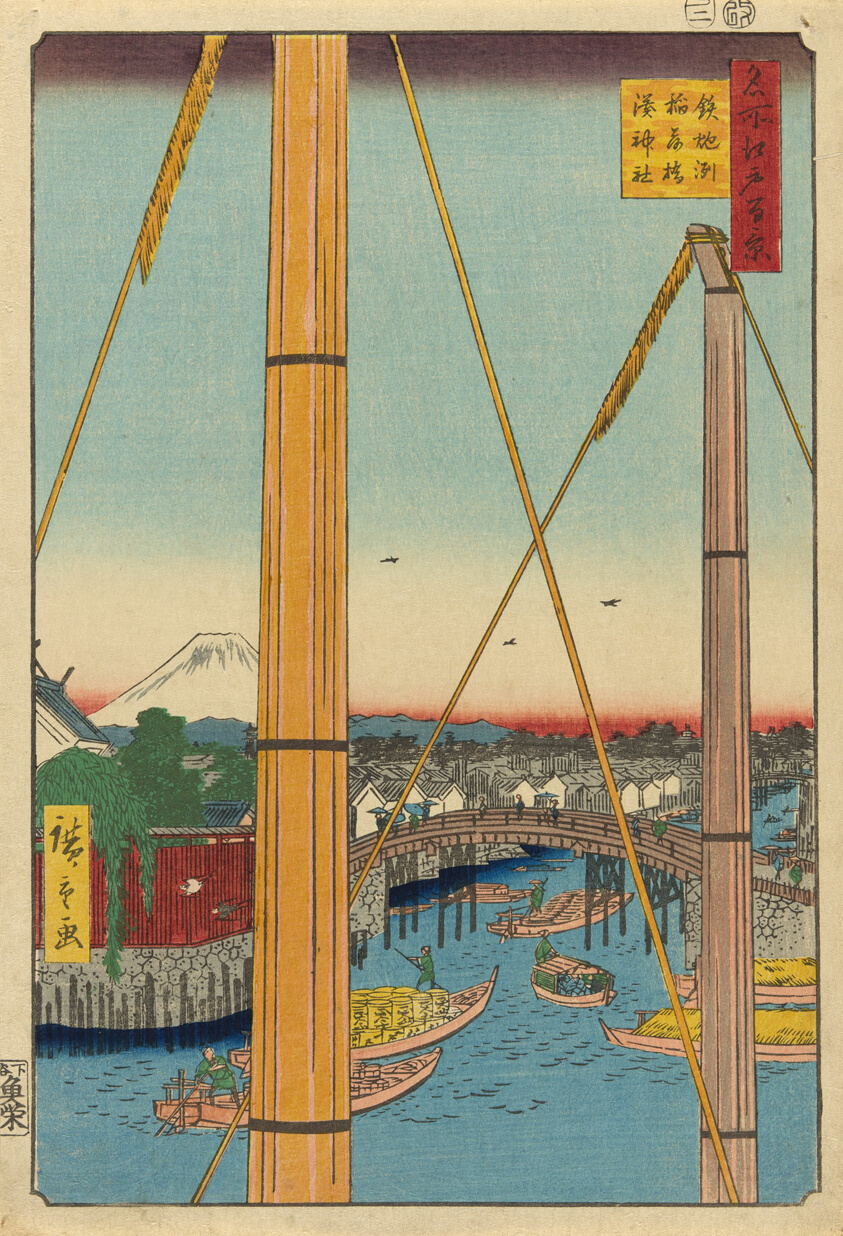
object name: Print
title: Inari Bridge and Minato Shrine, Teppozu (Teppozu Inaribashi Minato Jinja), from the series "One Hundred Famous Views of Edo (Meisho Edo hyakkei)"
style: Japanese (culture or style)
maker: Utagawa Hiroshige 歌川 広重; Japanese, 1797–1858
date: 1857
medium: Color woodblock print; oban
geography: Japan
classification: woodblock print; print; asian art